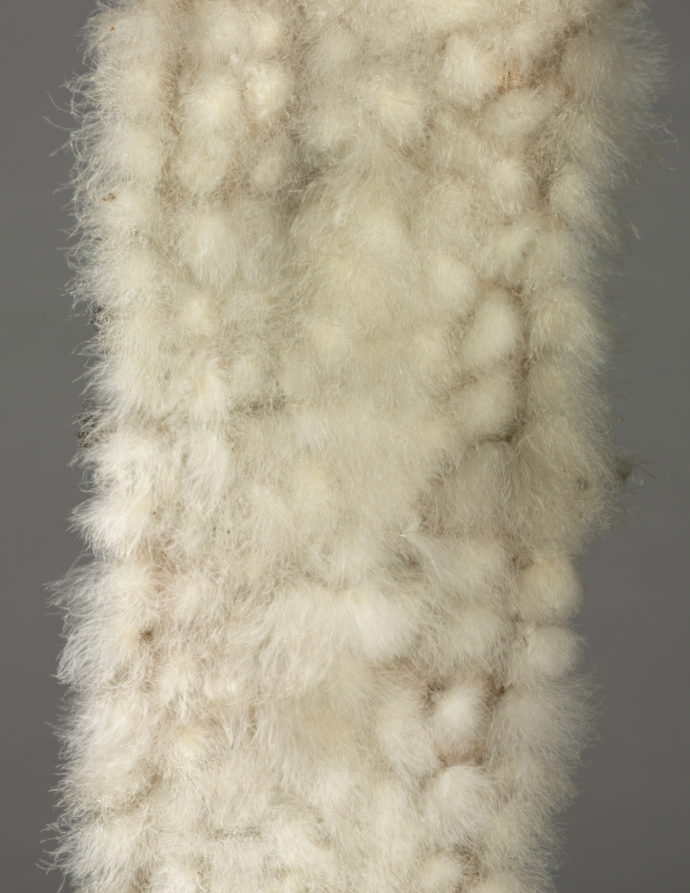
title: Pelerine (Collar or Cape)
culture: Northeastern Woodlands, Great Lakes/St. Lawrence River Region or Europe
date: c. 1830–1860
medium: Cotton, peacock feathers, guinea fowl feathers?, Gadwalls duck feathers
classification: Textile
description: Experts argue about collars of this type: Did a Great Lakes native artist make it, using as a model an English lady’s pelerine and exotic feathers obtained through trade? Or was the collar created by a European feather worker, perhaps after seeing the spectacular feather capes of native Hawaiian royals who visited England in 1824? There are arguments for both views—and for further research.